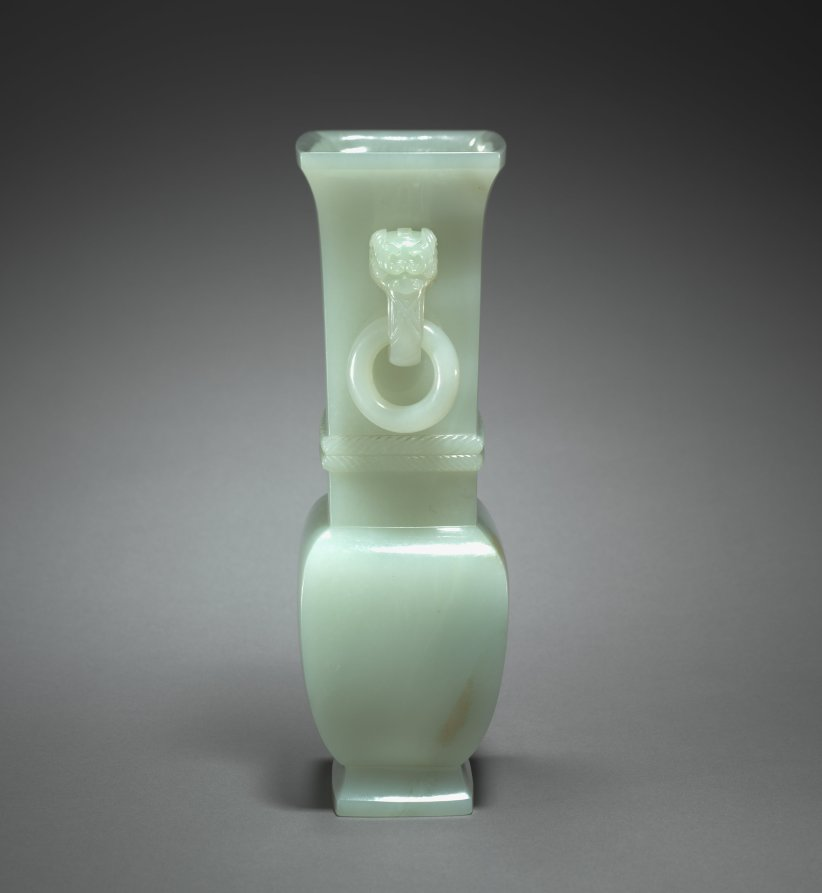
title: Vase in the Form of Archaic Hu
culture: China, Qing dynasty (1644–1911)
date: 1700s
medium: pale greenish-white jade with brown markings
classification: Jade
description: The square vase made entirely of jade imitates a ceramic or metal type with a corded string around its shoulder. Superbly carved are also the rings that hang loosely in handles held by feline animal heads.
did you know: Appreciated for its durability, hardness, luster, and subdued colors, jade was considered one of the most precious materials in China.